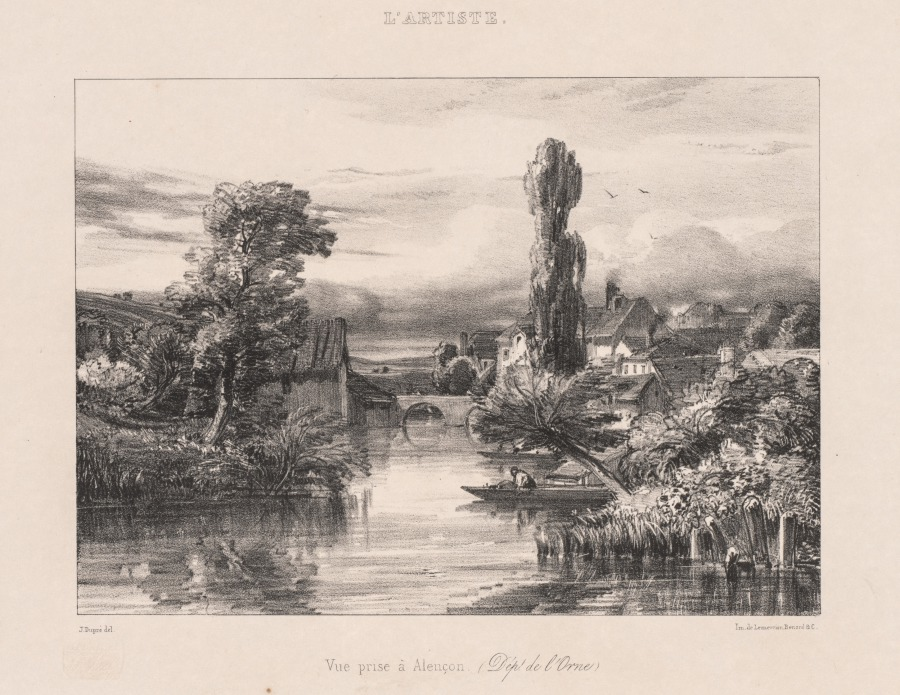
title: View taken at Alençon (Vue Prise à Alençon)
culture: France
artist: Jules Dupré (French, 1811–1889)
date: 1839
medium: lithograph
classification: Print